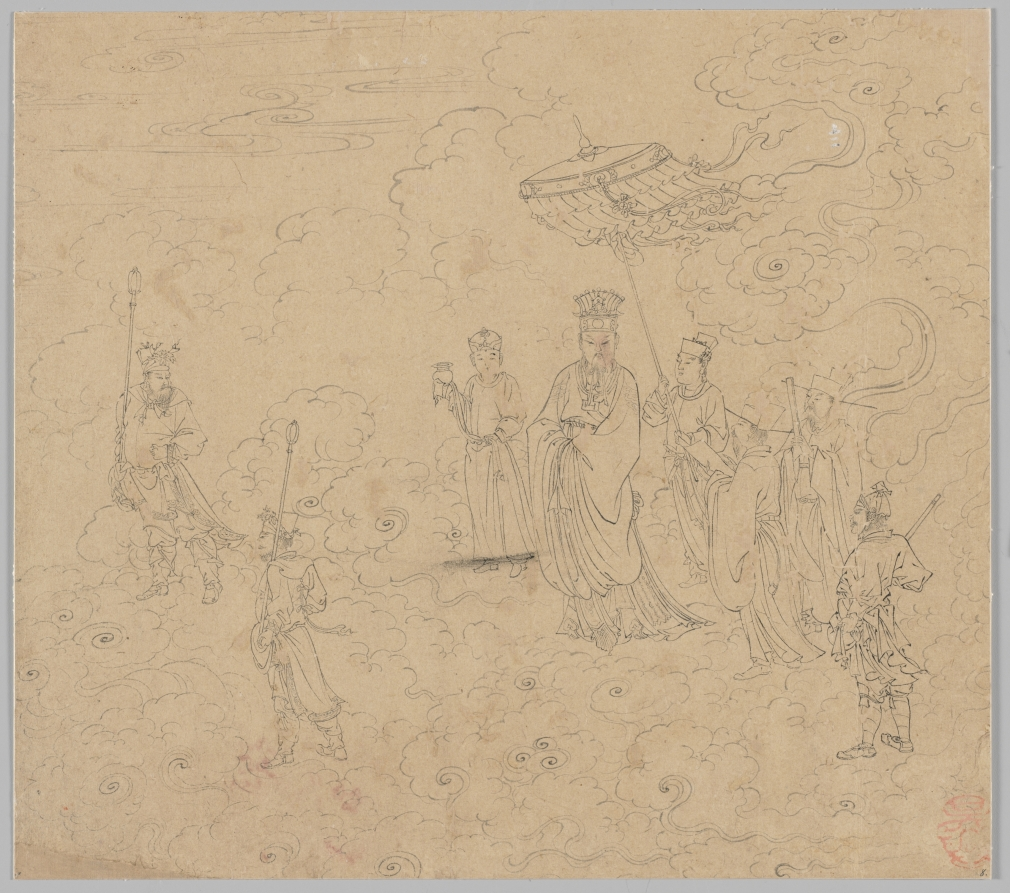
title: Album of Daoist and Buddhist Themes: Procession of Daoist Deities: Leaf 8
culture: China, Southern Song dynasty (1127-1279)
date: 1200s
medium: Album, ink on paper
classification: Painting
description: This extraordinary album has 50 paintings on a variety of religious subjects. They were likely created by several master craftsmen to share with studio apprentices as models for fulfilling commissions. The Jade Emperor and the Daoist pantheon make up the first 26 leaves. The next 14 leaves portray the Buddhist Ten Kings of Hell administering punishments to the dead. The third section, called “Clearing the Mountains,” features divine soldiers, led presumably by the deity Erlang Shen 二郎神, fighting undesirable creatures.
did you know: Six attendants escort a divine lord, likely one of the Five Emperors.